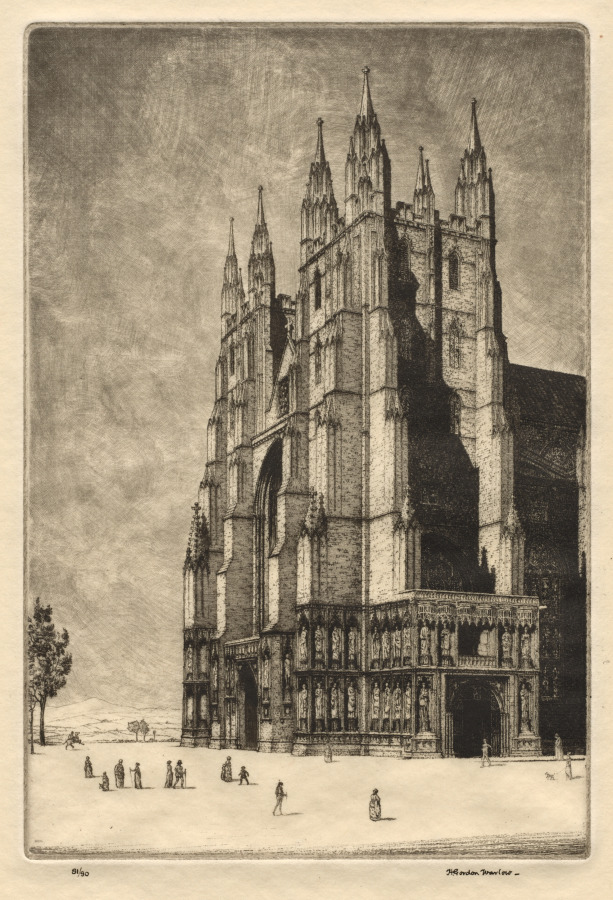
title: Canterbury Cathedral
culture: England, 20th century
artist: Herbert Gordon Warlow (British, 1885–1942)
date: c. 1930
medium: etching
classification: Print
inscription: Lower left:, in ink: 81/90; lower right, in ink: H. Gordon Warlow